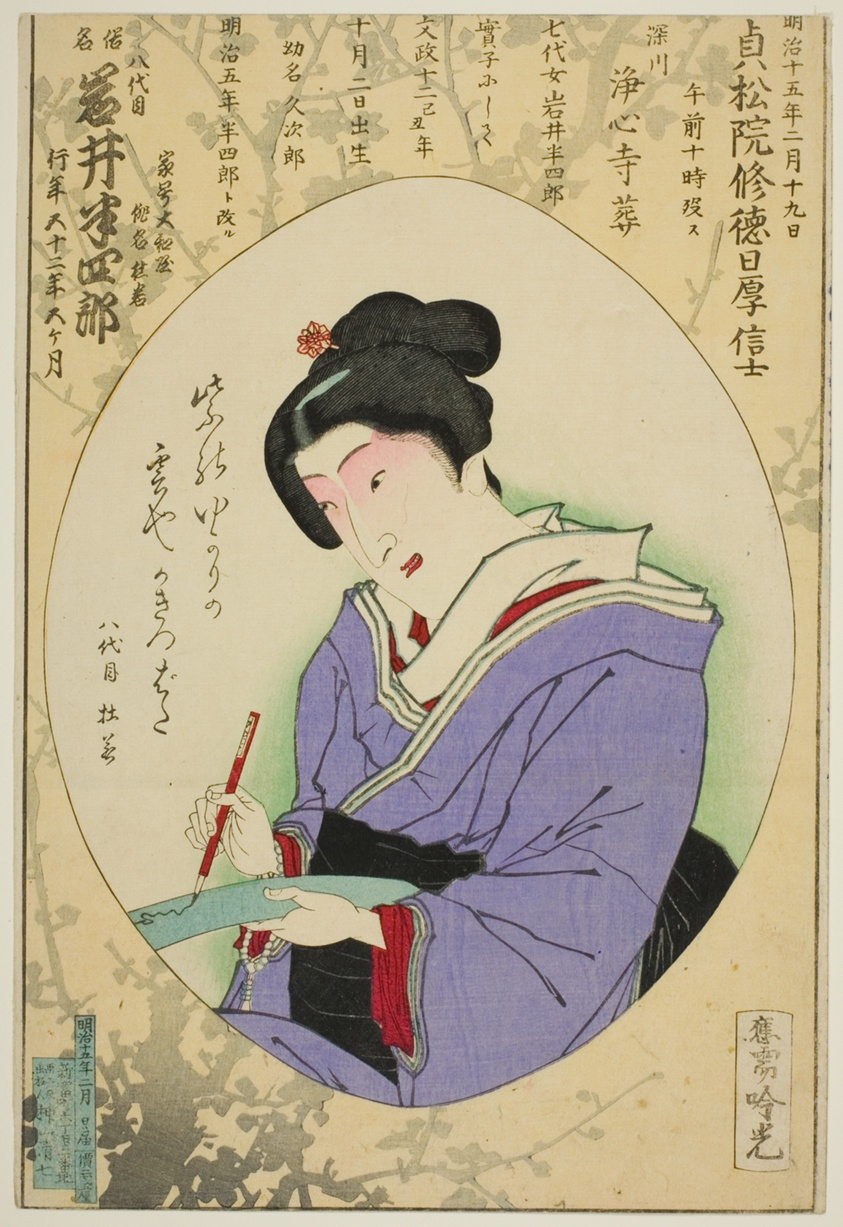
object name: Print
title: Memorial portrait of the actor Iwai Hanshiro VIII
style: Japanese (culture or style)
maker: Adachi Ginko (Japanese, active c. 1874-97)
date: 1882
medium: Color woodblock print; oban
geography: Japan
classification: print; asian art